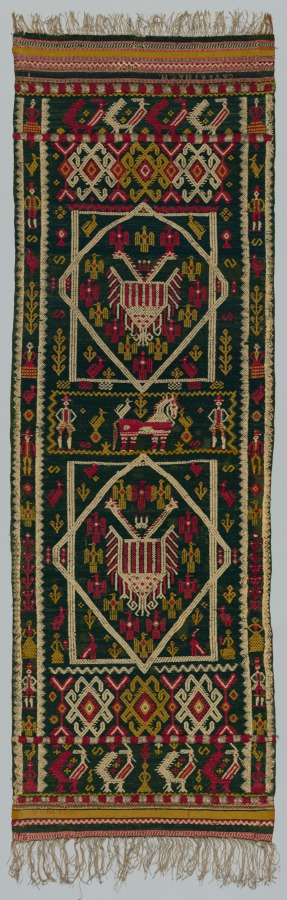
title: Woven Bed or Chest Cover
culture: Italy, Terra di Lavoro, 18th century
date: 1700s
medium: embroidery; wool on linen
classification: Textile